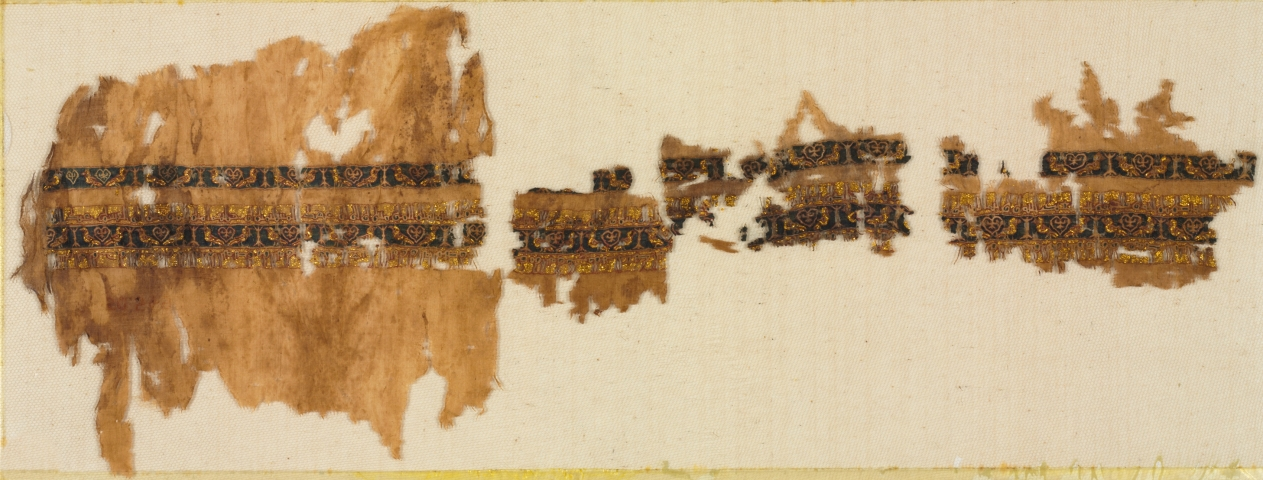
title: Tiraz with gold, probably from a wide sleeve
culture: Egypt, Fatimid period, reign of Caliph al-Hakim, 1013–20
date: 1013–1020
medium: plain weave with inwoven tapestry weave: linen, silk, and gold filé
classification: Textile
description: This textile with expensive gold foil is among the rarest surviving examples among thousands of medieval textiles with historic or generic inscriptions in Arabic, known as tiraz. Tiraz were "emblems of dignity," the prerogative of sovereigns and those they wished to honor. This inscription is masterful. The tall letters are woven with silk thread on only two warps in slit-tapestry weave while the ground was woven with pure gold foil wrapped around a silk core that was not beaten in—to show off its brilliance. The text begins with a prayer and provides the name of Imam al-Hakim, but lacks the place and date of manufacture. The decorative bands feature brilliant gold birds facing simplified trees alternating with popular palmette-decorated hearts. This tiraz fragment may have been part of a wide sleeve that functioned as a receptacle because clothing didn’t have pockets.